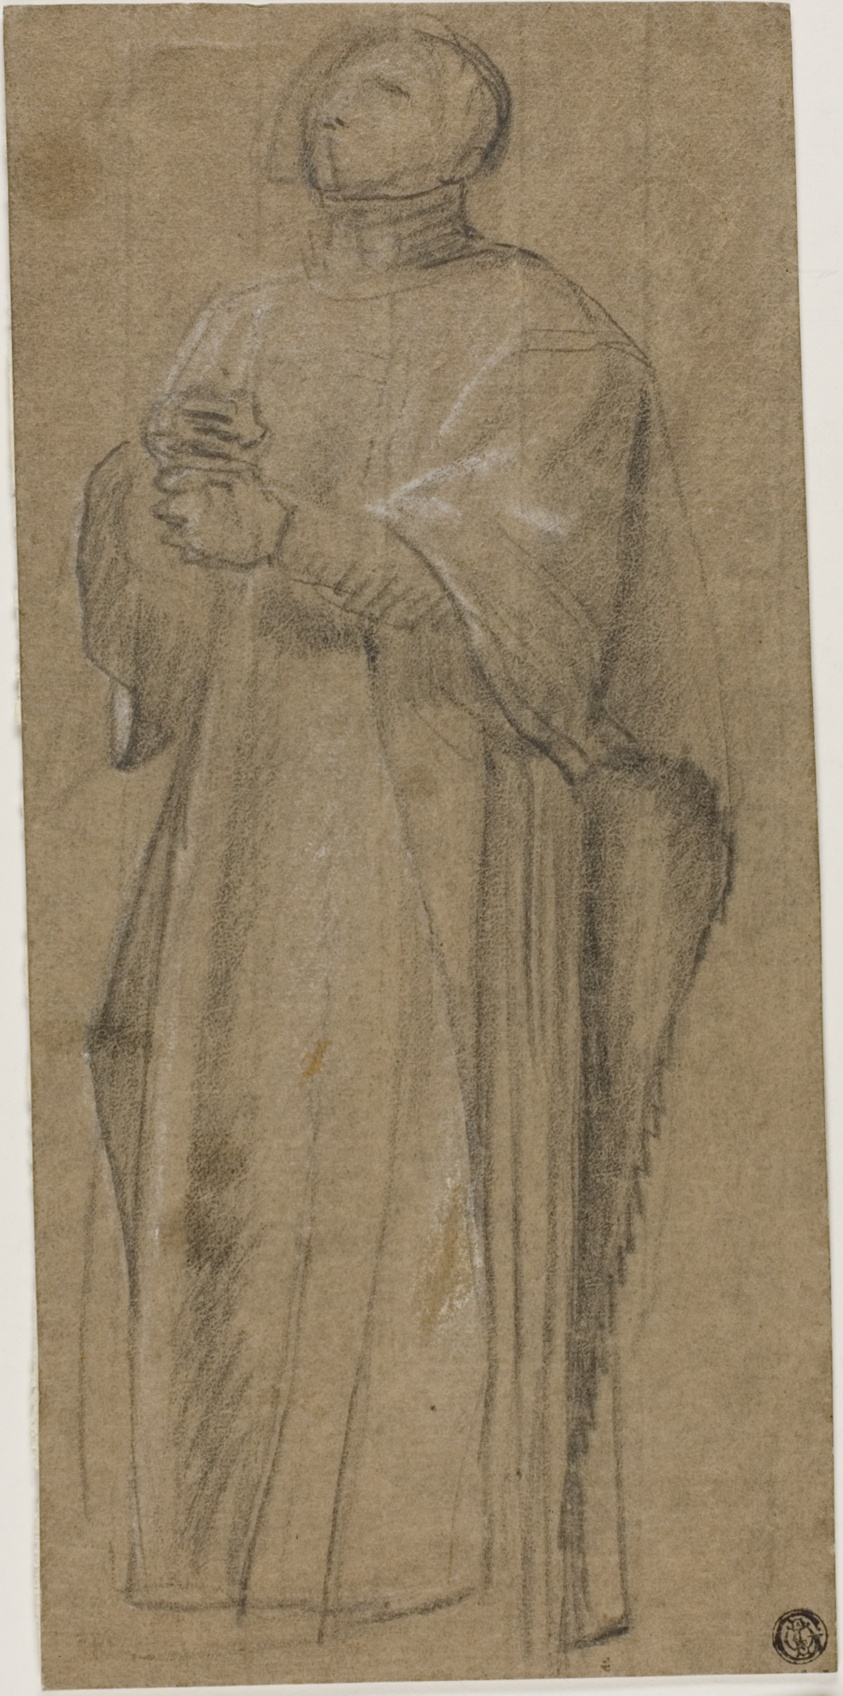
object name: Drawing and Watercolor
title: Study for Priest Bearing Crozier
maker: Eustache Le Sueur (French, 1617-1655)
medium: Charcoal, heightened with white chalk, on brown laid paper, laid down on ivory laid paper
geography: France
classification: charcoal; paper; drawings (visual works); prints and drawing